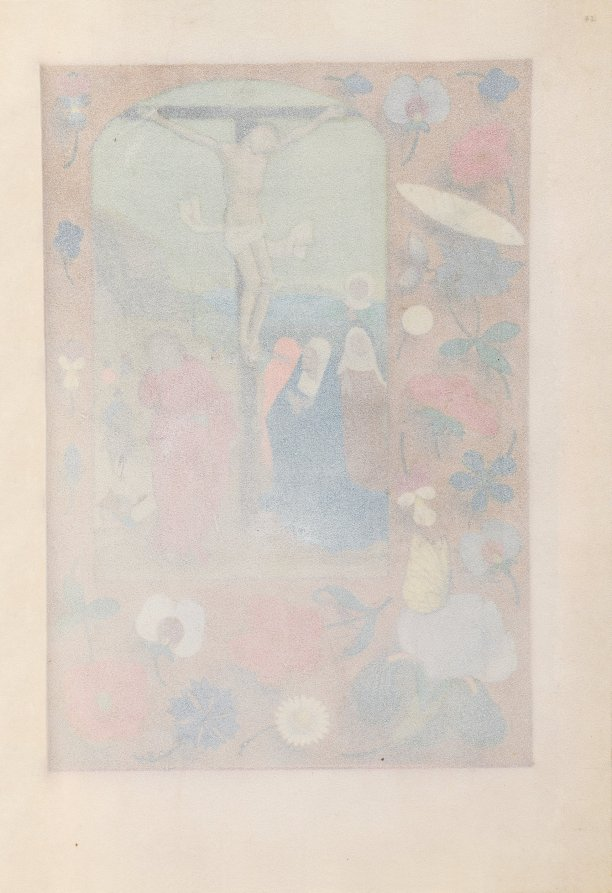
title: Hours of Queen Isabella the Catholic, Queen of Spain: Fol. 72r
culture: Flanders, Ghent and Bruges, late 15th century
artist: Master of the First Prayerbook of Maximillian (Flemish, c. 1444–1519)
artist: and Associates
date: c. 1500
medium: ink, tempera, and gold on vellum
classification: Bound Volume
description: This manuscript was illuminated by a circle of at least five highly organized manuscript painters active in the Flemish cities of Ghent and Bruges. The principal illuminator was Alexander Bening, who painted the majority of the book's miniatures. Manuscripts produced by this circle of artists are renowned for the decoration of their borders, which typically feature a rich variety of realistically-painted flowers, birds, and butterflies. This prayer book, called a book of hours, was intended not for a cleric, but for the private devotions of a lay person-in this case, Isabella the Catholic, Queen of Spain (1451-1504). Isabella's coat of arms embellishes the book's frontispiece. It is unlikely that the book was commissioned by the Queen herself; rather, she probably received it as a diplomatic gift from someone courting her patronage, perhaps Cardinal Francisco Jimenez de Cisneros. A Franciscan friar, Jimenez was dependent upon Isabella for his advancement, first to the post of Queen's confessor in 1492, and then to Archbishop of Toledo in 1495.